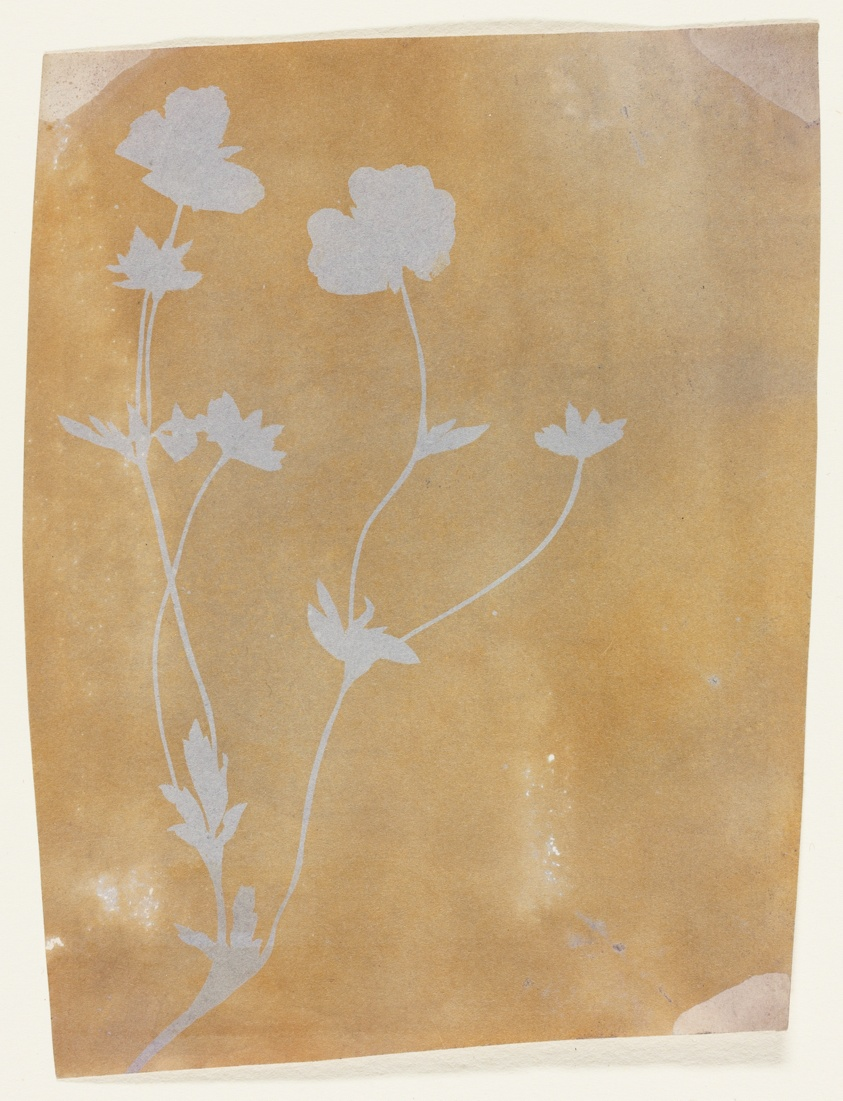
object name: Photograph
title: Stem of Leaves and Flowers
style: 19th century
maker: William Henry Fox Talbot (English, 1800–1877)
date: c. 1835/37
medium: Photogenic drawing, stabilized (fixed) in potassium iodide, potassium bromide or ammonia water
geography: England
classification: salted paper print; photographic process; photography; photograph